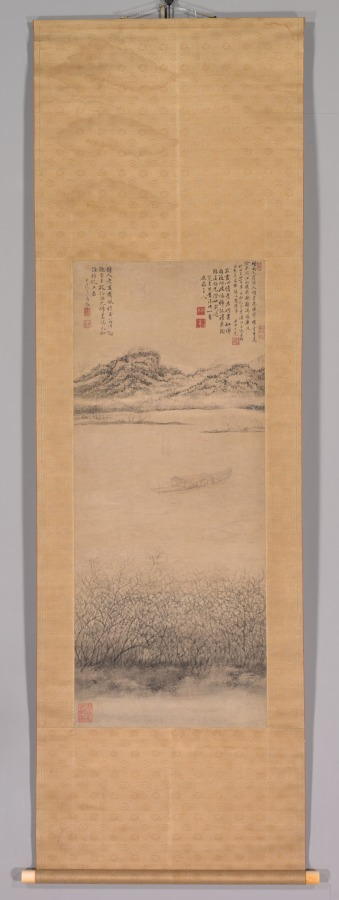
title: The Crossing of the Yangzi River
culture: China, Qing dynasty (1644-1911)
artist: Shang Rui (Chinese, 1634?-)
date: c. 1700–1720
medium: hanging scroll, ink and slight color on paper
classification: Painting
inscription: Colophons: One upper left inscription by the artist followed by two seals; one upper right inscription followed by two seals; three other seals, one in lower left